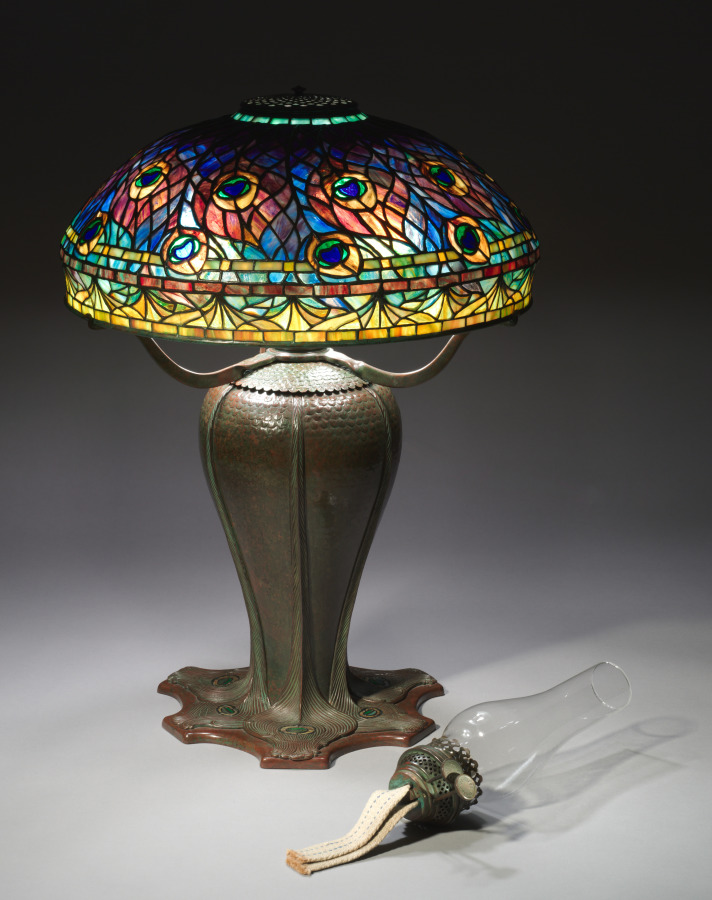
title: Peacock Table Lamp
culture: America, New York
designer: probably by Clara Wolcott Driscoll (American, 1861–1944)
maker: Tiffany Studios (United States, New York, 1902–32)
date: c. 1902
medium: Leaded glass, bronze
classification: Lamp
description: The peacock, with its brilliantly colored iridescent plumage, was a favorite motif of Louis Comfort Tiffany, appearing in almost every genre of his artistic production. The Peacock table lamp, created by Tiffany's chief lamp designer Clara Wolcott Driscoll, evokes the wide circular swath of a peacock's preening feathers and attracted critical acclaim to both Driscoll and Tiffany Studios. This particular version retains its original kerosene burning fluid apparatus as well as an electric bulb armature. Although incandescent lamp bulbs had become more widely available in the 1890s, most households, even those of the wealthy, were not yet wired for electricity. Tiffany originally designed his lamps with an oil-burning apparatus, consisting of a reservoir and a double wick and chimney, as well as an electric attachment. He cleverly predicted, though, that electric households would eventually become commonplace, so he soon moved to all-electric designs, greatly increasing the illumination and appeal of his lamps.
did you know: Originally designed to burn kerosene, this Peacock lamp still retains its original double wick and oil reservoir along with an adapter for electric light bulbs.